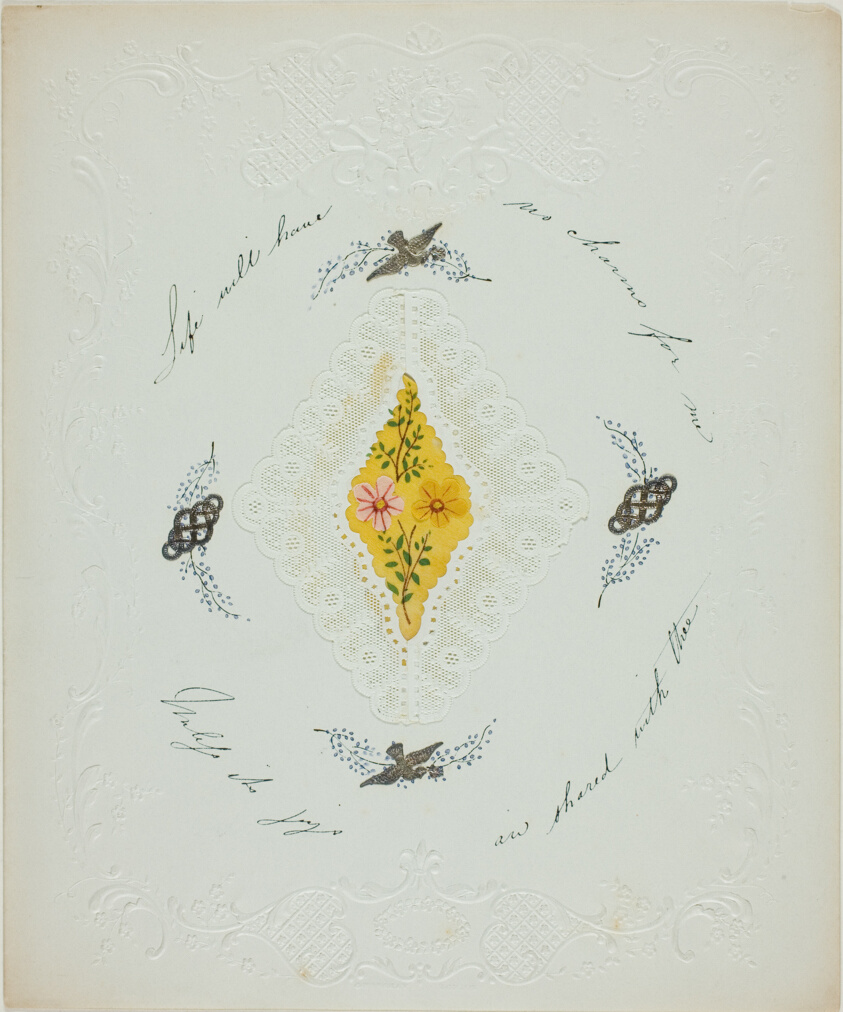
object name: Drawing and Watercolor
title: Life Will Have No Charms for Me (valentine)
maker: George Kershaw (English, 19th century)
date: c. 1850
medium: Collaged elements and watercolor, with pen and black ink on embossed off-white wove paper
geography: England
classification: valentine; prints and drawing; paper